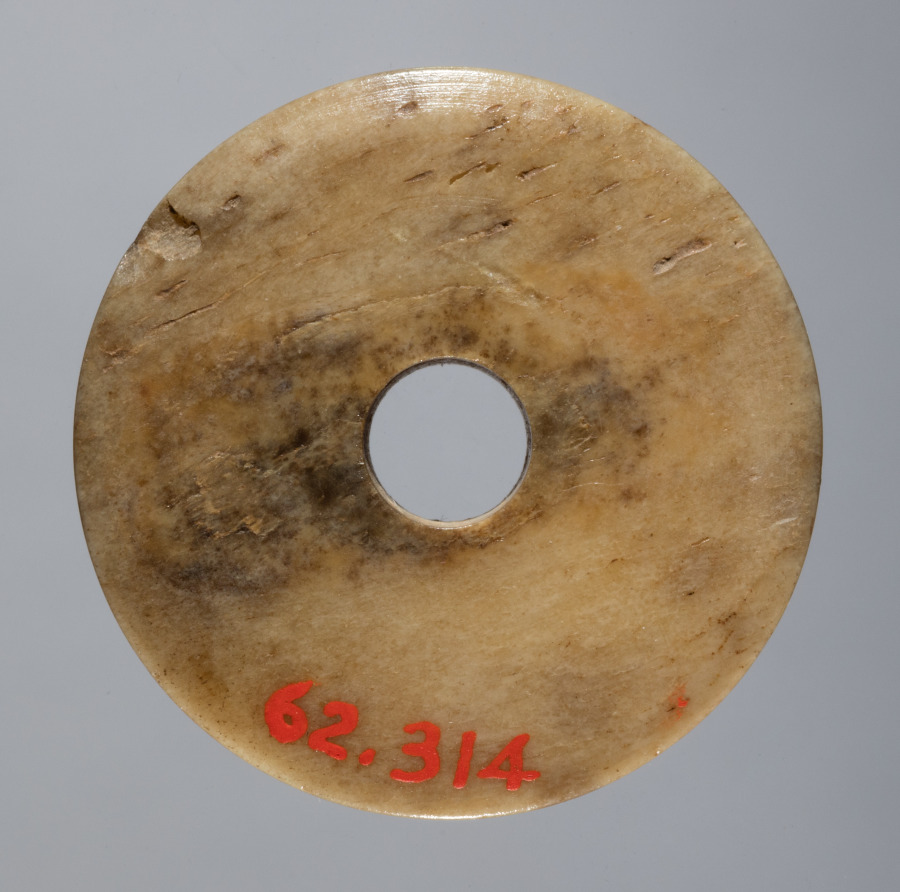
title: Spindle Whorl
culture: Iran, early Islamic period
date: 700s - 900s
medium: bone, incised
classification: Spindle Whorl